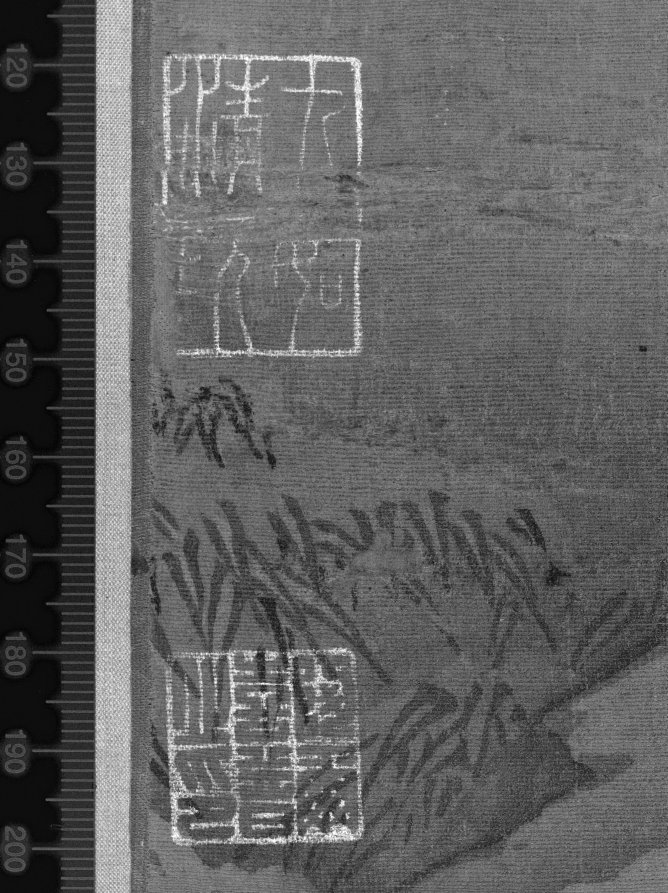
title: Birds in a Grove in a Mountainous Winter Landscape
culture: China, Jin dynasty (1115-1234)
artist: possibly by Gao Tao (Chinese, 1100s)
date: 1100s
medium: hanging scroll; ink and slight color on silk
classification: Painting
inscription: A signature and a seal at lower left edge: Gao Tao 高燾; seal undecipherable. 10 additional seals: 1 of Zhu Gang 朱棡 [1358–1398]; 3 of Suo’etu 索額圖 [1636–1703]; 2 of A’erxipu 阿爾喜普 [1700s]; 1 of Weng Fanggang 翁方綱 [1733–1818]; 3 unidentified.